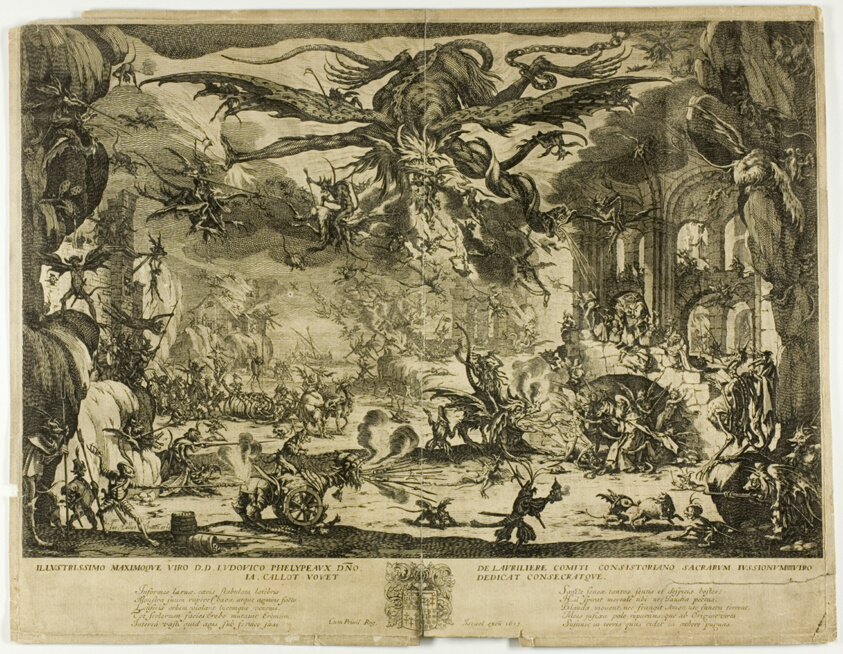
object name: Print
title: The Temptation of Saint Anthony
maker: Jacques Callot (French, 1592-1635); published by Israël Silvestre (French, 1621-1691)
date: c. 1635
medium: Engraving on paper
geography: France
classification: engraving; print; prints and drawing